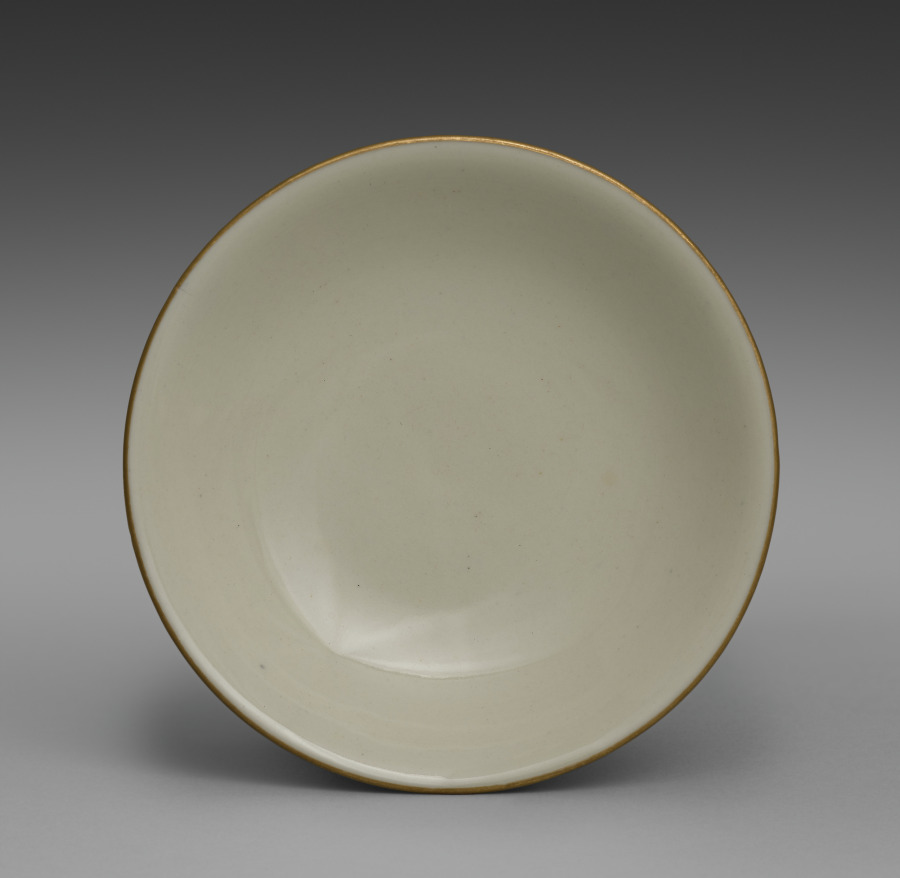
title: Cover for a Bowl from Dining Set with Plum Blossoms and Cracked-Ice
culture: Japan, Meiji period (1868–1912)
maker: Seifū Yohei II (Japanese, 1844–1878)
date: c. 1875–78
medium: Porcelain with molded designs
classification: Ceramic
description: Each item in this set has a delicate low-relief design of flowering plum branches over scattered, intersecting lines meant to resemble the cracked-ice surface of a frozen body of water and is signed on the base in gold pigment. While Yohei II produced many fine works in underglaze blue, like those produced by Kiyomizu Shichibei, he also made works in quite different styles later in his career, from the early 1870 s. In 1873, he was appointed purveyor to the Industrial Center of Kyoto Prefecture, a designation associated with Kyoto’s efforts to reach an international market through the port of Kobe; and from 1875 until his death, he was involved in national-level projects to present Japanese ceramics across the world. It was during this period that Yohei III was apprenticed to Yohei II, and it has been suggested that this set may in fact be an early example of Yohei III’s work, which he signed with his teacher’s name. Decorated with flowers resembling Japanese textile motifs, the set calls to mind the design of Yohei II’s pair of vases with plum blossoms in the Victoria and Albert Museum. Here, the elaborate trees created for a formal public exhibition setting have been translated into the approachable blossoms of the genteel domestic environment. While the designs are consistent across the pieces, each raised flower petal and pistil and each incised line in the ice was done by hand, so the cups, bowls, and dishes are similar yet unique. The bottoms of two boxes once identified the set’s owner, but the information has been deliberately obscured with black ink. However, inscriptions still visible appear to indicate two occasions, once at the end of July 1886 , and once again in June 1916 , when parts of the set were requested from Hokura in Niigata Prefecture. The location corresponds to a neighborhood in the present-day city of Jōetsu. The surname Tsuji 辻 also appears on a paper tag affixed to one of the box cloths. Future research may possibly reveal more about their provenance. A vase by Yohei III in a private collection combines the formal grandeur of the Yohei II vases in the Victoria and Albert Museum with the gentler design of this dining set, placing flowering plum trees against soft, scalloped-edge clouds resembling those in golden screens.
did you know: The dining wares have a creamy white coloration that the four boxes containing them identify as Korean in style.